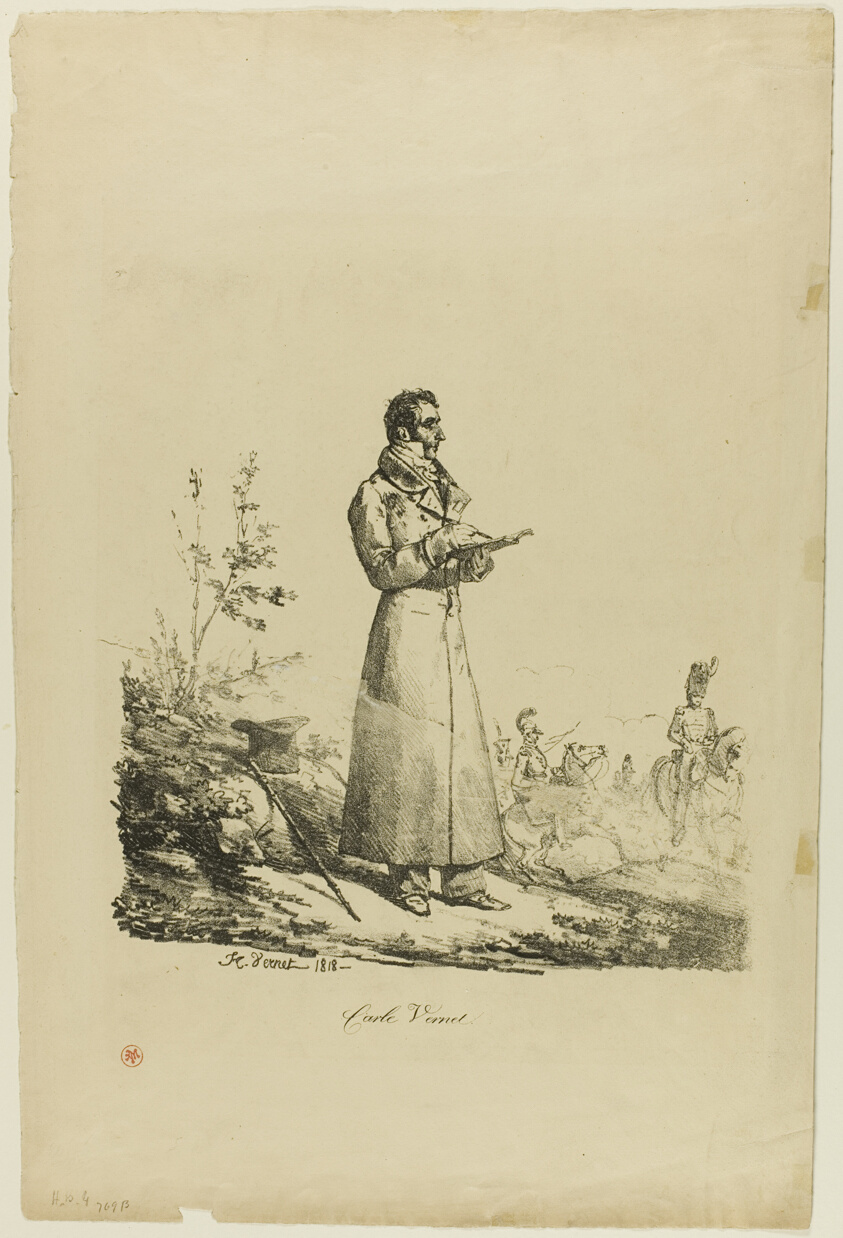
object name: Print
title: Portrait of Carle Vernet, Standing and Drawing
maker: Horace Vernet (French, 1789-1863)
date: 1818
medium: Lithograph in black on tan wove paper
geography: France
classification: lithograph; print; prints and drawing